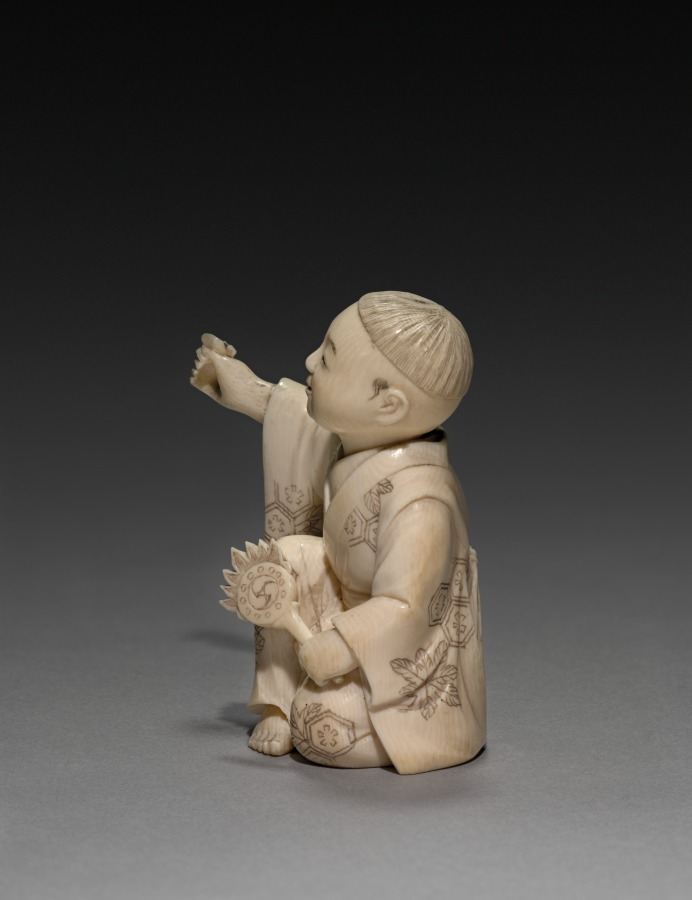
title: Kneeling Boy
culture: Japan, Meiji period (1868–1912)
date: early 1900s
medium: ivory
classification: Ivory